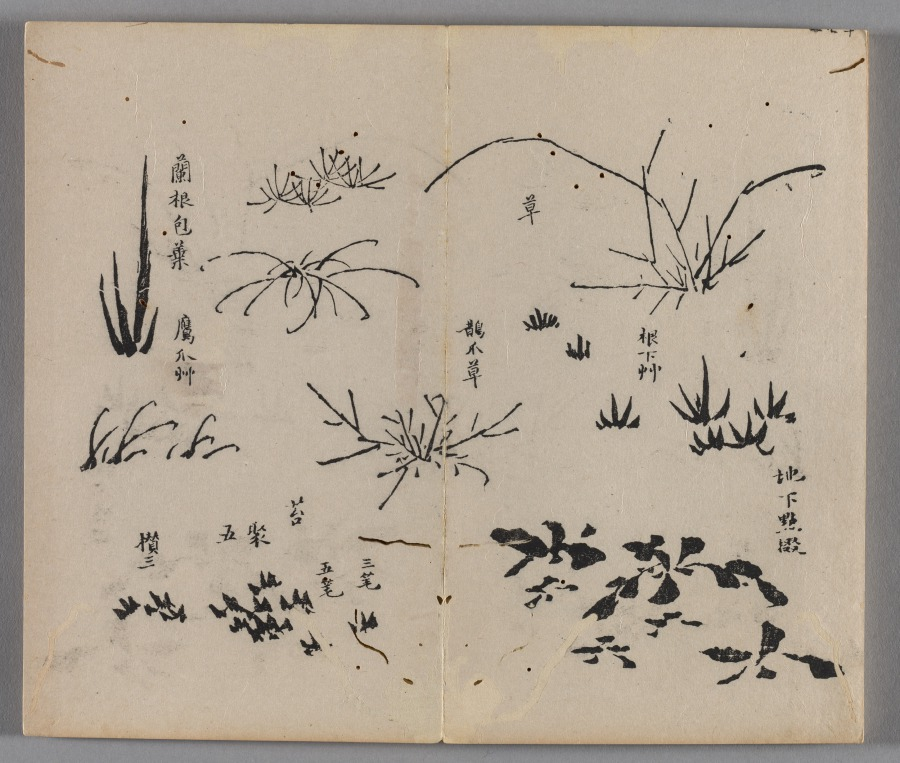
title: Ten Bamboo Studio Painting and Calligraphy Handbook (Shizhuzhai shuhua pu): Orchids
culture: China, Qing dynasty (1644-1911)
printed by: Hu Zhengyan (Chinese, c. 1584–1674)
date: 1633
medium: Woodblock-printed book; ink and colors on paper; first edition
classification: Print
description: Color printing reached a level of perfection in the early 1600s, as seen in this Ten Bamboo Studio Collection of Calligraphy and Painting and the Mustard Seed Garden Manual of Painting (printed 1679 and 1701). The painterly quality, precision in registering (aligning) the woodblocks, and harmonious colors made them the most successful color print editions in Chinese history. Both editions were printed and compiled in Nanjing, spread nationwide, and had a great impact on the arts in Japan and Korea.